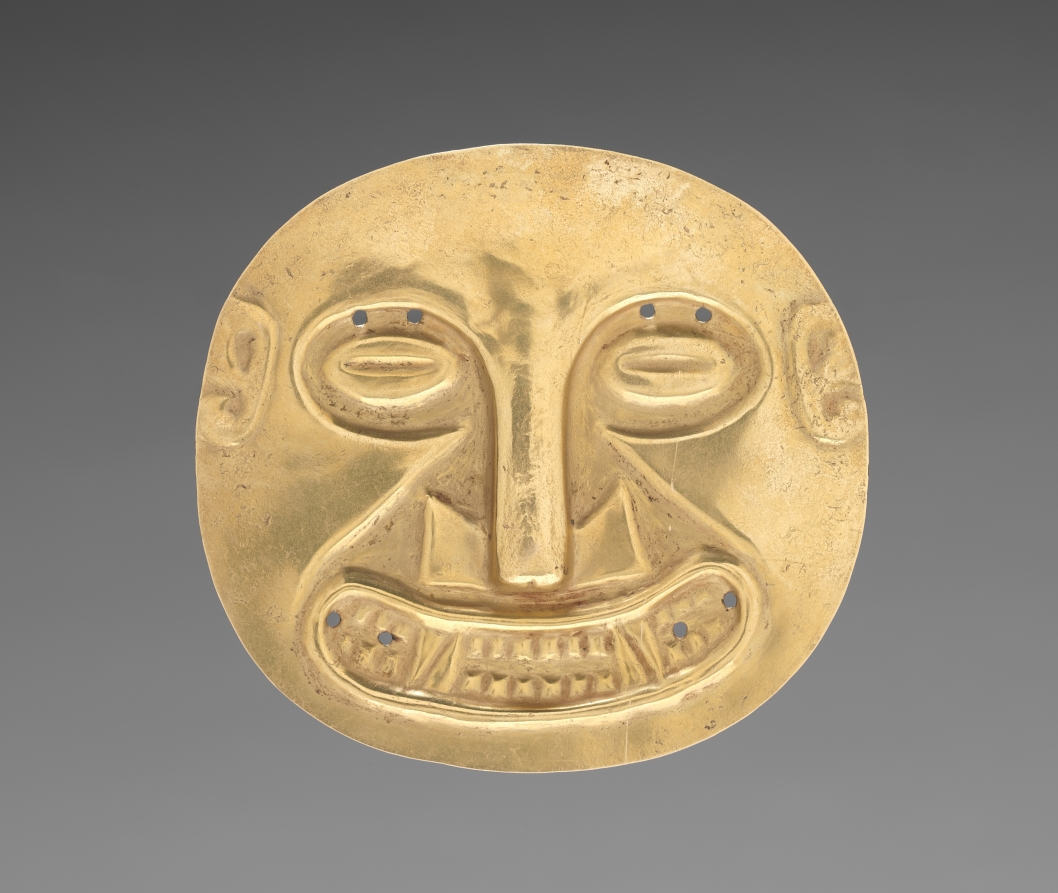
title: Ornament from Sitio Conte: Small Plaque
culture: Panama, Conte style, 5th - 10th century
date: c. 400–500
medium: hammered gold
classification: Metalwork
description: Harvard archaeologists excavated this ornament from Grave 32 at Sitio Conte, a cemetery famous for its lavish graves of powerful chieftains. The warm gleam of gold linked rulers with the sun’s creative force.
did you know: This disk was excavated from a burial containing three bodies.